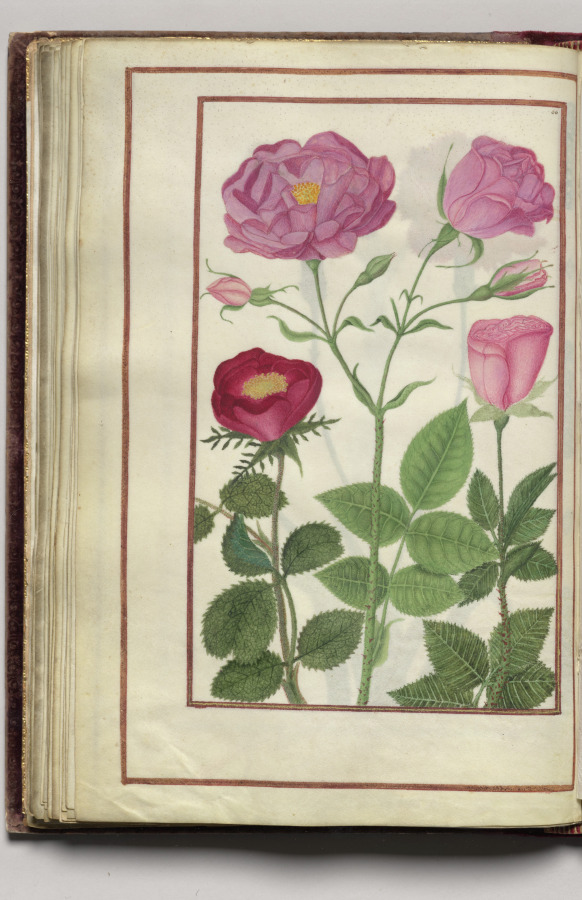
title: Roses, folio 33 (verso), from Florilegium (A Book of Flower Studies)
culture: France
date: 1608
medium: watercolor, ink, silver, and gold over occasional traces of pencil, on vellum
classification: Bound Volume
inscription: Dated: Poitiers 1608 (on frontispiece) Signed: On frontispiece in black ink, lower right: Van Kuyk Notation on drawing: Frontispiece: in pencil, lower margin: * élève de Van Kessel, peintre flammand (* in pencil also appears in front of Van Kuyk's name).